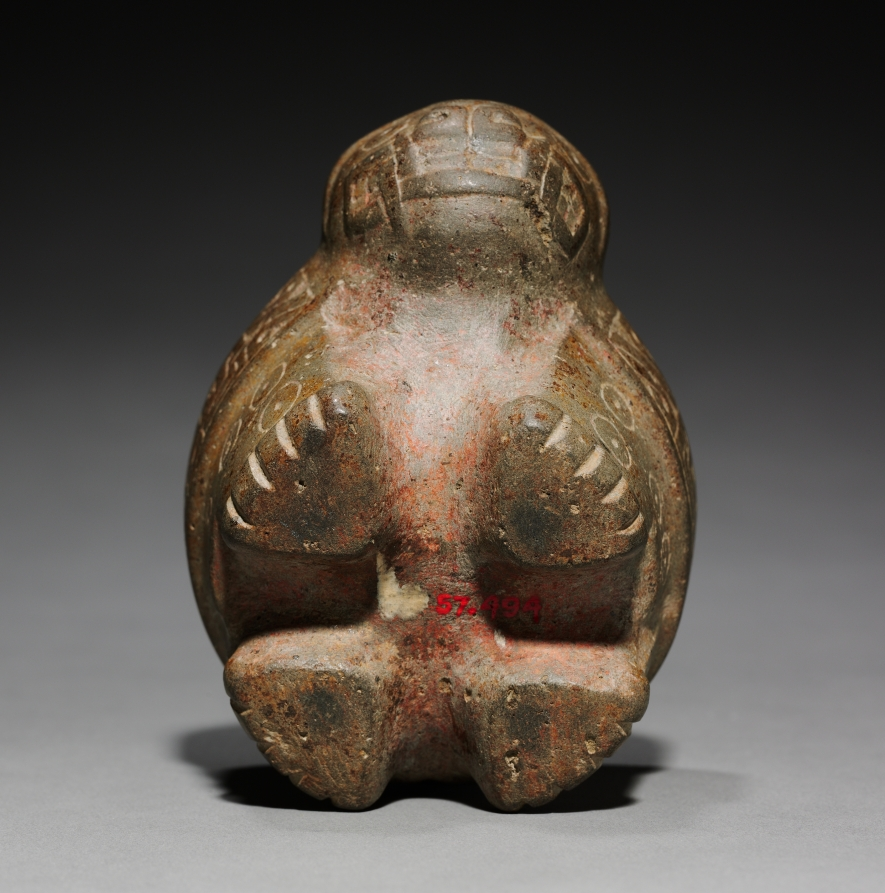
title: Feline Mortar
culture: Peru, North Highlands, Pacopampa(?), Chavín style (900-200 BCE)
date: 700–1 BCE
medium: stone, pigment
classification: Stone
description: Size suggests that this Chavín-style mortar was not used to grind bulky staples like corn, but instead pigments or plant hallucinogens used in religious rites to achieve spiritual insight and communion with cosmic forces. This may come from Pacopampa, a site in the northern highlands where elites adopted Chavín deities and worshiped them alongside local deities. These small sculptures illustrate the appeal and the spread of Chavín religion.